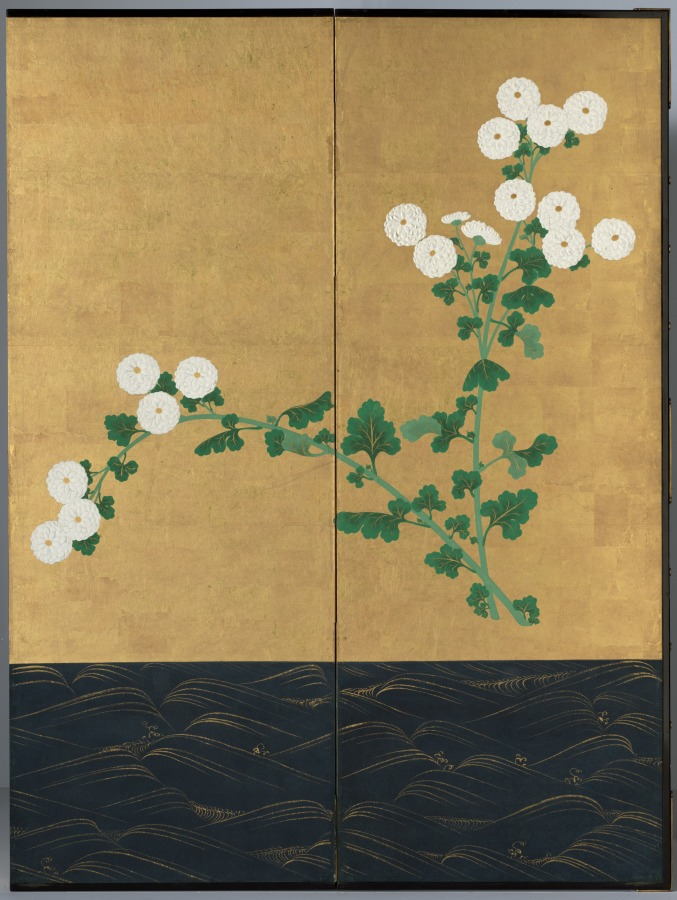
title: Chrysanthemums by a Stream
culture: Japan, Edo period (1615–1868)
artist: possibly by Ogata Kōrin (Japanese, 1658–1716)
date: c. 1715–30 or after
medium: One of a pair of six-panel folding screens; ink and color on gilded paper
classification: Painting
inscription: the signature and seal of Korin, "sensen mappa (makko) inshi hokyo Korin" (late generation hermit of the Kamo stream tradition) is written in two lines. A circular seal which reads "Hoshuku" is at the end of the second line on the edge of the first panel from the right.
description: These screens recall a painting style so closely identified with Ogata Kōrin (1658–1716) that it is called Rinpa, or “Rin School,” after the ideograph “rin” in his name. The highly stylized background accentuates floral groupings that have been groomed so as to appear utterly artificial, like the synthetic arrangements available today. Kōrin's genius derived in large measure from natural phenomena painstakingly observed and then manipulated to create compositions of startling refinement and sparkling isolation. This process may have grown out of Kōrin's early immersion in the family textile business, a medium that encourages such dramatic distillations of form: the stream's gold-crested waves bring to mind traditional kimono robe designs of Kōrin's era. Works with the signature seen on this painting, including a style name, or persona suggested to Kōrin by his brother Kenzan (1663–1743), are sometimes considered to have been produced either in the last year of his life, when he was very ill, or after his death. In both scenarios, the lion’s share of the work would have been done by studio assistants, but little is truly known of his studio practice. Given the regularity of the gold waves on the stream, and the tension in the arrangement of the chrysanthemums, it is also possible that the screens were made in emulation of Kōrin's designs by a later artist.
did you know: The signature used on these screens may indicate paintings made in the last year of the artist's life, or works completed by his studio after his death.